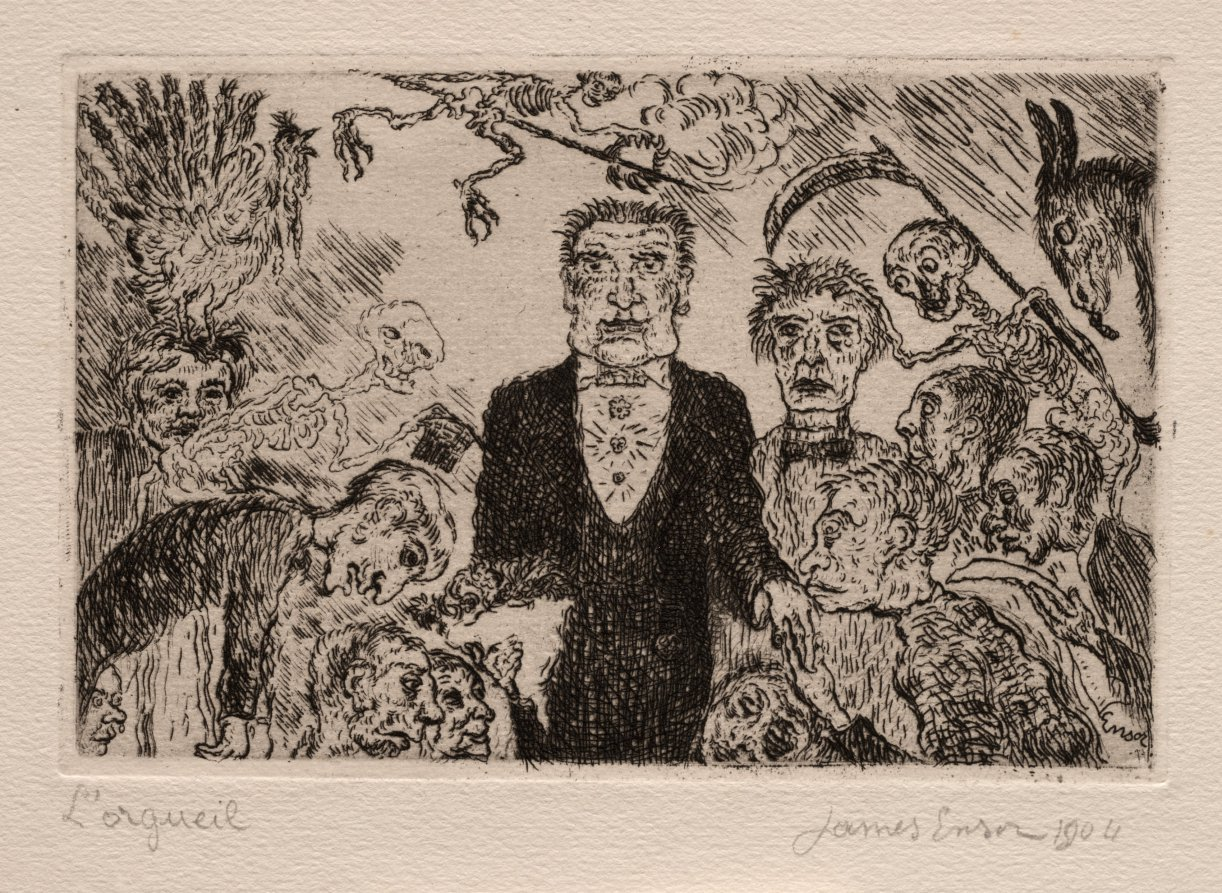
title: The Seven Deadly Sins: Pride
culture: Belgium, 19th-20th Century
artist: James Ensor (Belgian, 1860–1949)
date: 1904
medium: etching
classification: Print